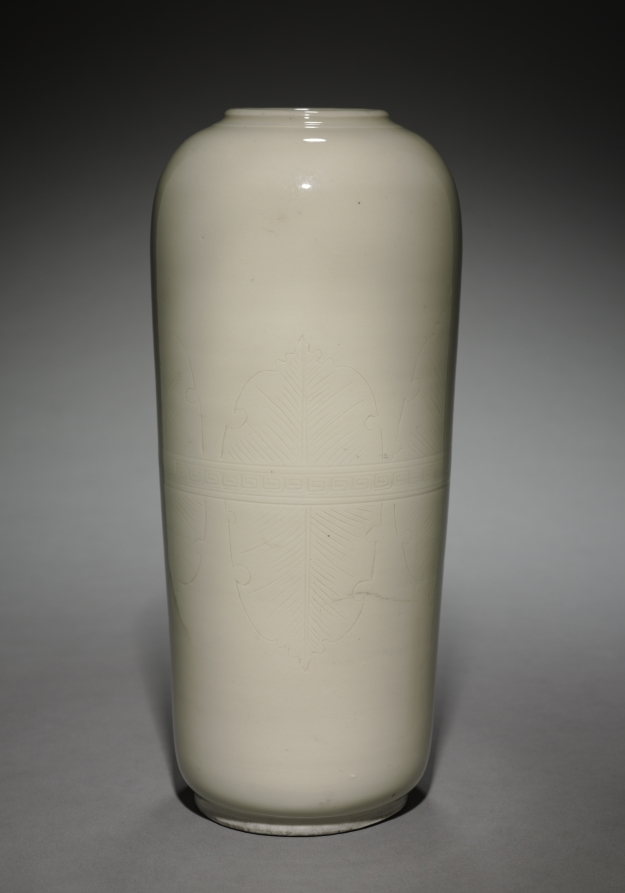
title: Vase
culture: China, Qing dynasty (1644-1911)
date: 1644–1911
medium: porcelain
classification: Ceramic